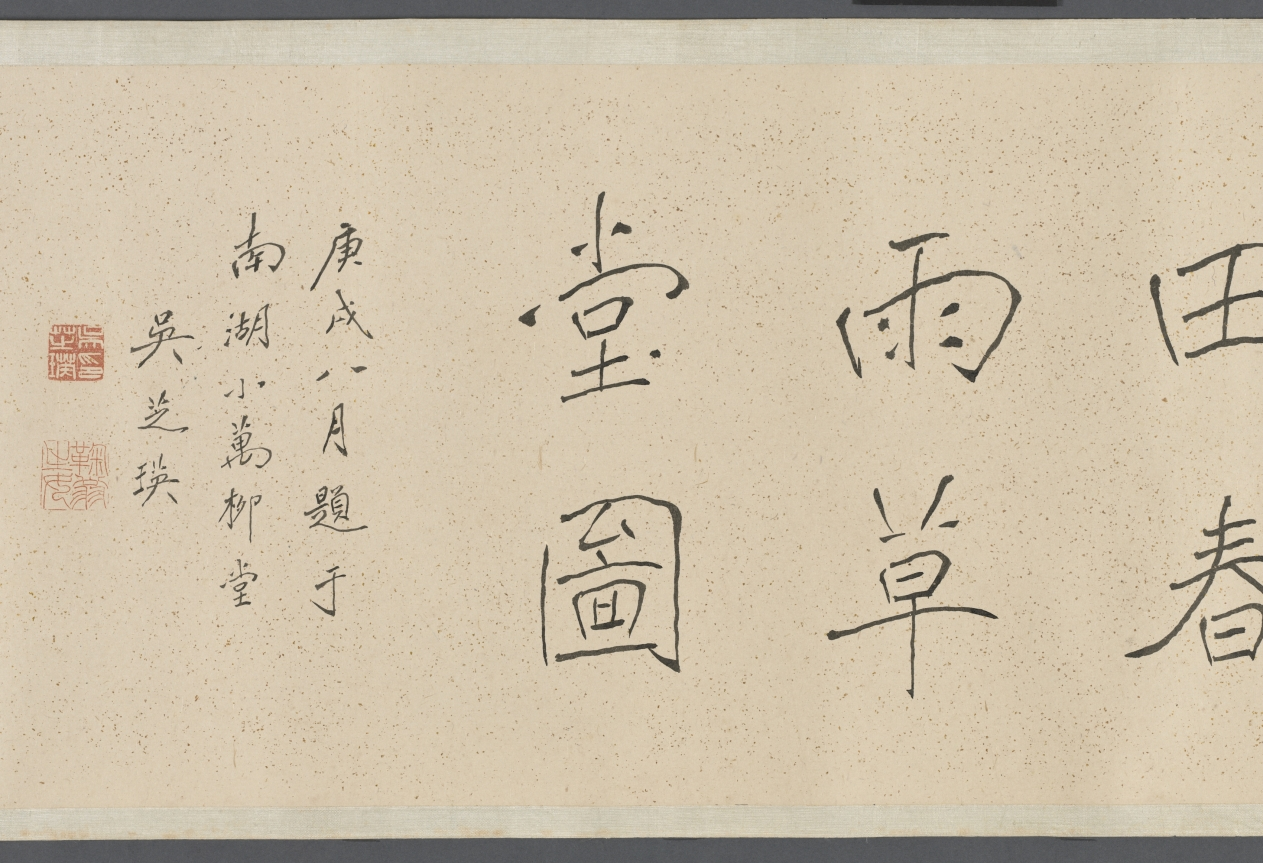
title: Spring Rain Thatched Hut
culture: China, Qing dynasty (1644-1911)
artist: Wang Jianzhang (Chinese, active 1621–1662)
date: 1650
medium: handscroll, ink on paper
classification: Drawing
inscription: Title by Wu Zhiying 吳芝瑛 (1868–1933), dated 1910.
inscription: 春雨草堂圖。庚寅仲春，為紫玄社兄畫於若耶溪上。 仲初王建章。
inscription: 12 colophons by Gong Weiliu’s 宮偉鏐 (1611–1680) contemporaries: Fang Gongqian 方拱乾 (1596–1667, jinshi of 1628); Jiang Cai 姜埰 (1607–1673); Liang Yizhang 梁以樟 (1608–1665); Du Shaokai 杜紹凱 (also named Du Jie 杜岕, 1617–after 1689), dated 1648; Zhao Kaixin 趙開心 (d. 1663), dated 1647; Zhao Erbian 趙而忭 (d. 1658); Yu Yaoguang 余耀光, dated 1649; Yao Quan 姚佺, dated 1648; Chen Taisun 陳台孫 (b. 1611, jinshi of 1640); (Monk) Shao 韶; Du Zhujin 杜祝進; and Tang Shi 唐時.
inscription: 此研田莊居士王建章為先太史紫元公所作春雨草堂圖也。居士字仲初，明崇禎間人，與先太史及惲香山相友善。喜畫佛像，自謂不讓李公麟。山水祖述董源，筆力雄健，有不可羈勒之概。香山稱其墨有五采，非世人所知。然性廉重，非同志不輕落筆，人得其寸圖尺縑，必相與忻賞，如獲蜼彝兕敦，非人世間物也！見先太史筆記，此圖寫雨景，而氣韻生動，勃勃於不能止。每一展覽，覺滿紙雲烟，墨瀋猶濕，如寫吾先人胸中未盡之邱壑也。圖後題詠，多一時名手，想見文采風流之盛。迄今二百餘年，舊德先疇，遺風未沫。吾子孫其永寶之，如與吾先人接謦咳於一堂，為感思之助，其敢作圖畫觀乎！同時香山亦有圖佚去己久，不知異日能為延津之合否。壬申長夏本昂重裝敬識。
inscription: Collectors' seals including: Gong Ben'ang 宮本昂 (1821–1874); Lian Qian 廉泉 (1868–1932); Wu Zhiying 吳芝瑛 (1868–1933)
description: With its striking simplicity, this painting captures the pure serenity of a private garden in the moist atmosphere of a spring morning on a small river. Painted in the style of Ni Zan, Wang Jianzhang dedicated this work to his patron-friend Gong Weiliu (1611-1680). Gong retired from government service after the fall of the Ming dynasty and constructed a garden-retreat at his native home in Taizhou, Jiangsu province. He invited scholars and poets from his literary society to contribute writings of his estate, which are here mounted together with the painting in this scroll.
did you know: Gong Weiliu, the owner of the estate portrayed here, had received his prestigious jinshi degree in 1643, but his official career was thwarted by the collapse of the Ming dynasty the following year.